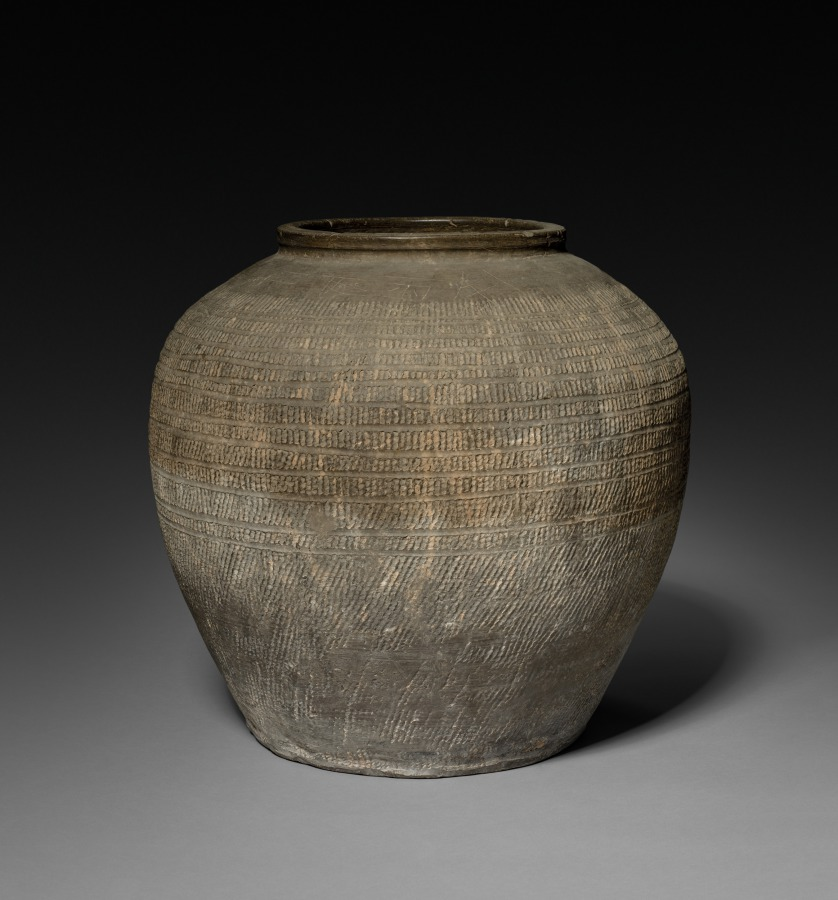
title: Jar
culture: China, Hunan province, reportedly Changsha, Eastern Zhou dynasty (770–256 BCE), Warring States period (475–221 BCE)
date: 481–221 BCE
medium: earthenware with impressed and incised decoration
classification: Ceramic